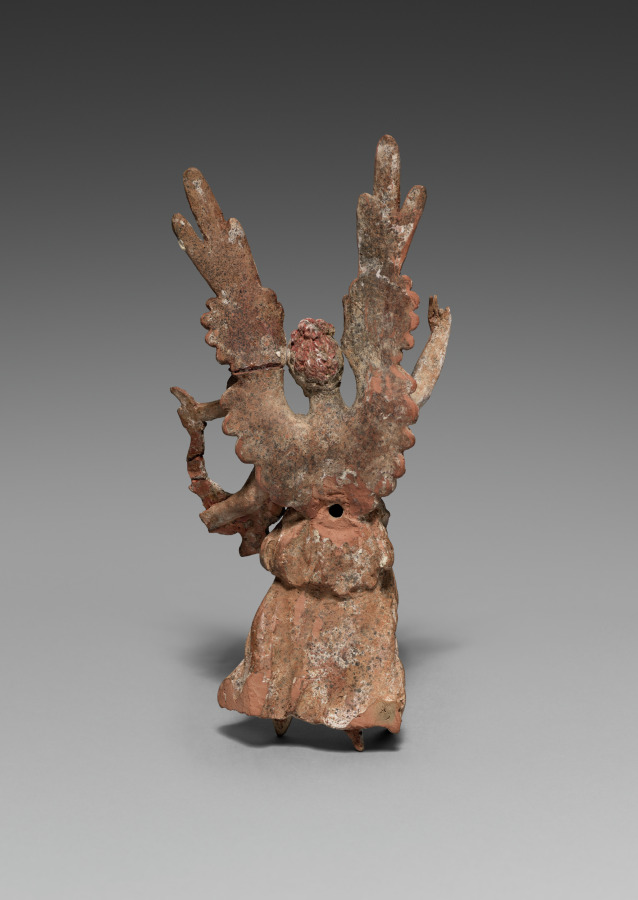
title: Figurine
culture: Greece, Myrina, Hellenistic period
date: 300–100 BCE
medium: terracotta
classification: Sculpture